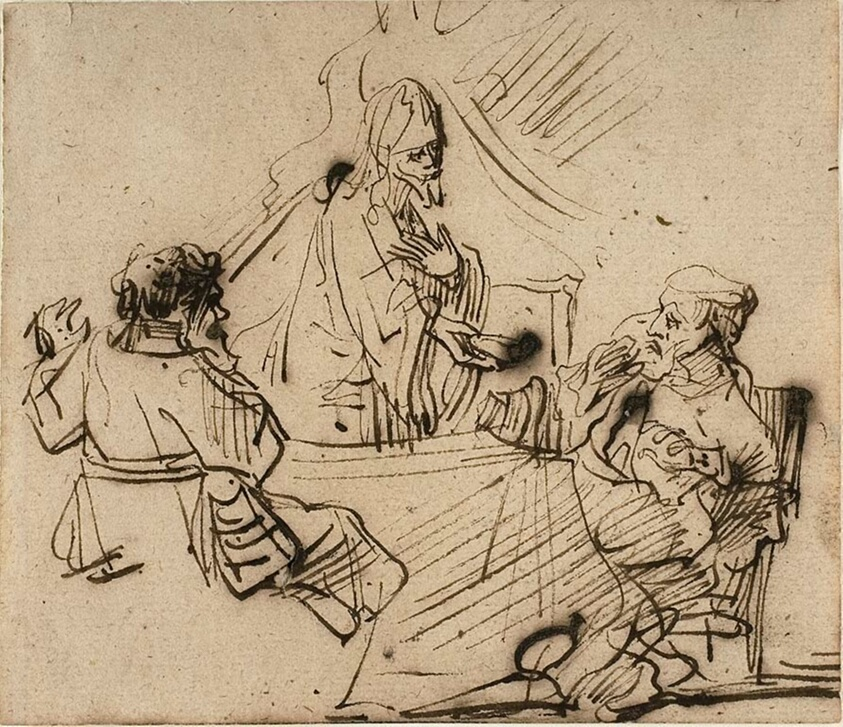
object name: Drawing and Watercolor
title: The Supper at Emmaus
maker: Follower of Rembrandt van Rijn (Dutch, 1606-1669)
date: 1626/69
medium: Pen and brown ink on cream laid paper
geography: Netherlands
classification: pen and ink drawings; paper; drawings (visual works); prints and drawing